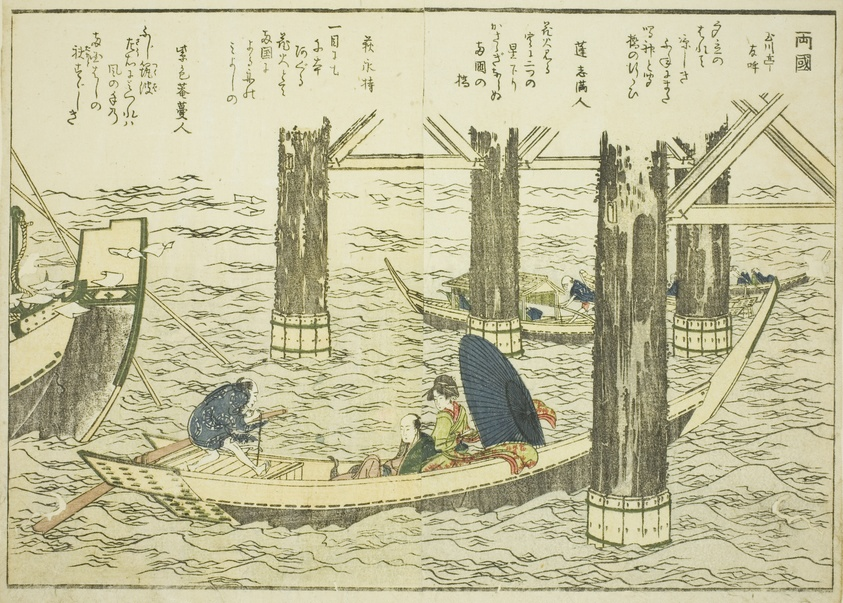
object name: Print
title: Ryogoku Bridge, from vol. 1 of the illustrated book "Fine Views of the Eastern Capital at a Glance (Toto shokei ichiran)"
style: Japanese (culture or style)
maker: Katsushika Hokusai 葛飾 北斎; Japanese, 1760-1849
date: 1800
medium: Color woodblock print; double-page illustration from book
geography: Japan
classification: woodblock print; print; asian art